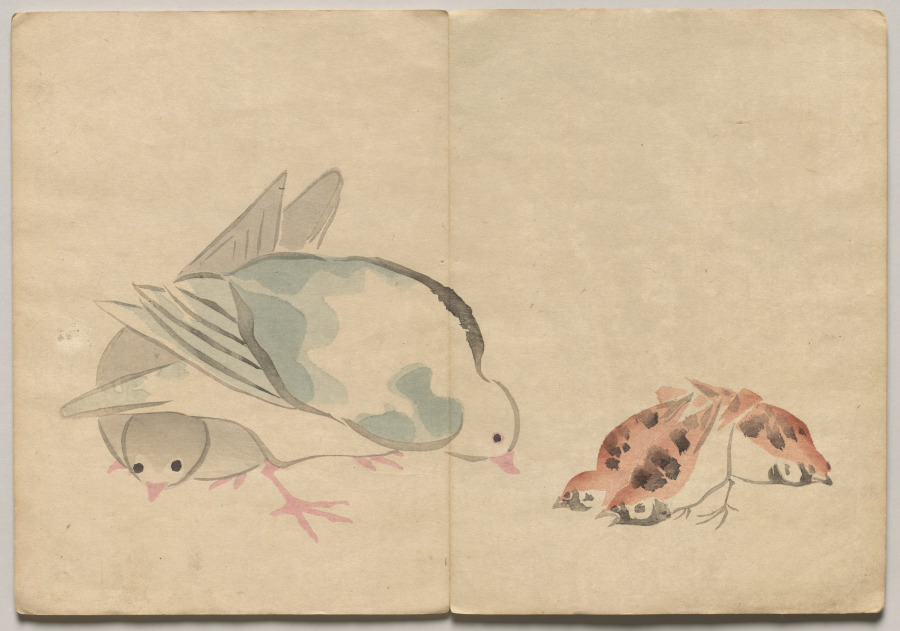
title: Scene from The Kōrin Picture Book (Volume 1)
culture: Japan, Edo period (1615–1868)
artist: Nakamura Hōchū (Japanese, d. 1819)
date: 1800s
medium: color woodblock printed book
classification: Bound Volume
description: Ogata Korin (1658-1716) was one of the most admired artists of Rimpa, or "decorative school painting." These books by the charming later-generation Rimpa artist Hochu record Korin's inventive designs.